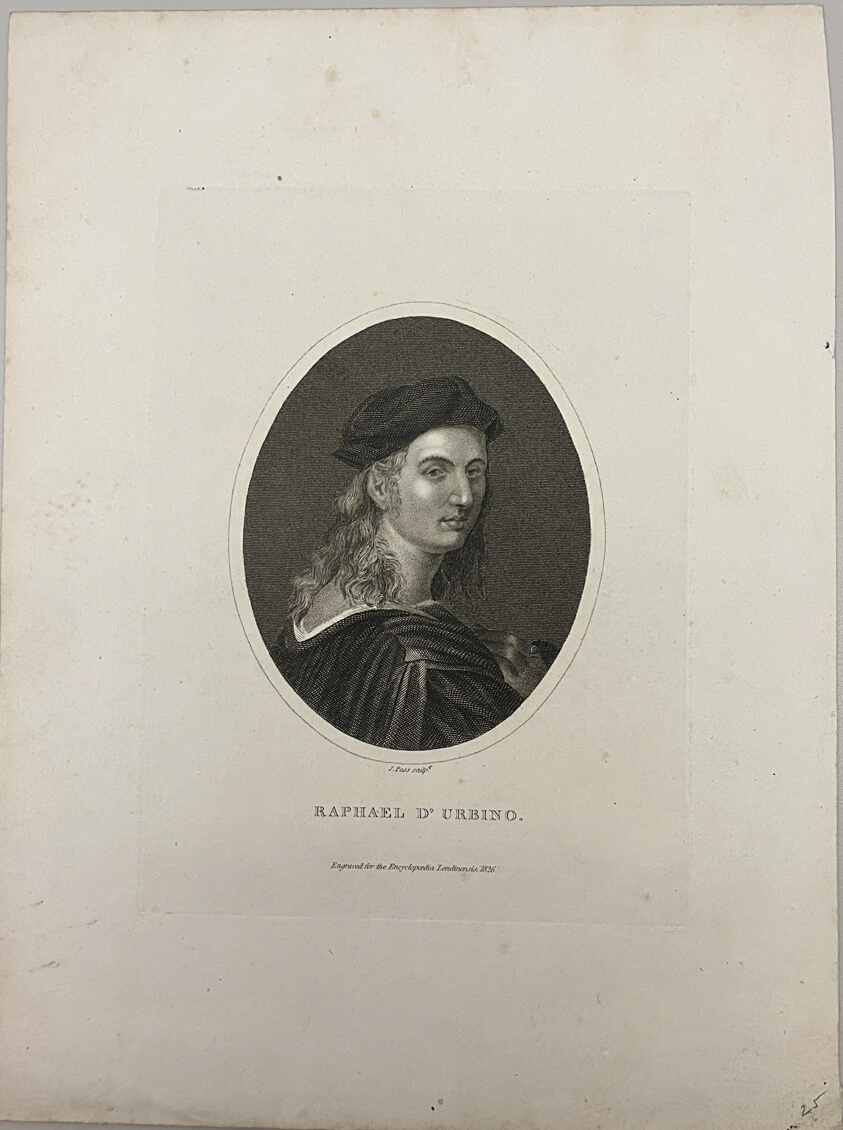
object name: Print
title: Raphael d'Urbino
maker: Artist Unknown (Likely American or British, 19th century)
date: 1826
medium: Steel engraving on paper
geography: United States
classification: reproduction; print; prints and drawing